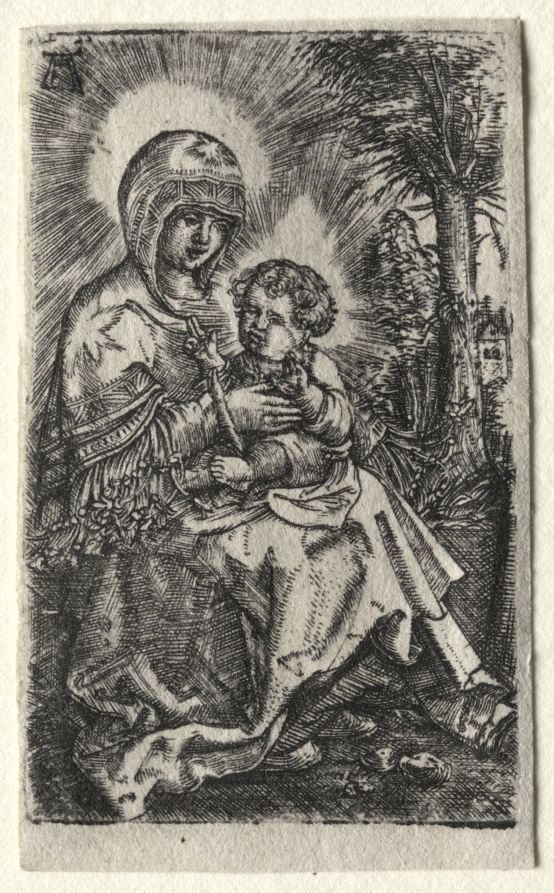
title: The Beautiful Virgin of Ratisbon in a Landscape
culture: Germany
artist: Albrecht Altdorfer (German, c. 1480–1538)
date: 1520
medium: engraving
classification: Print